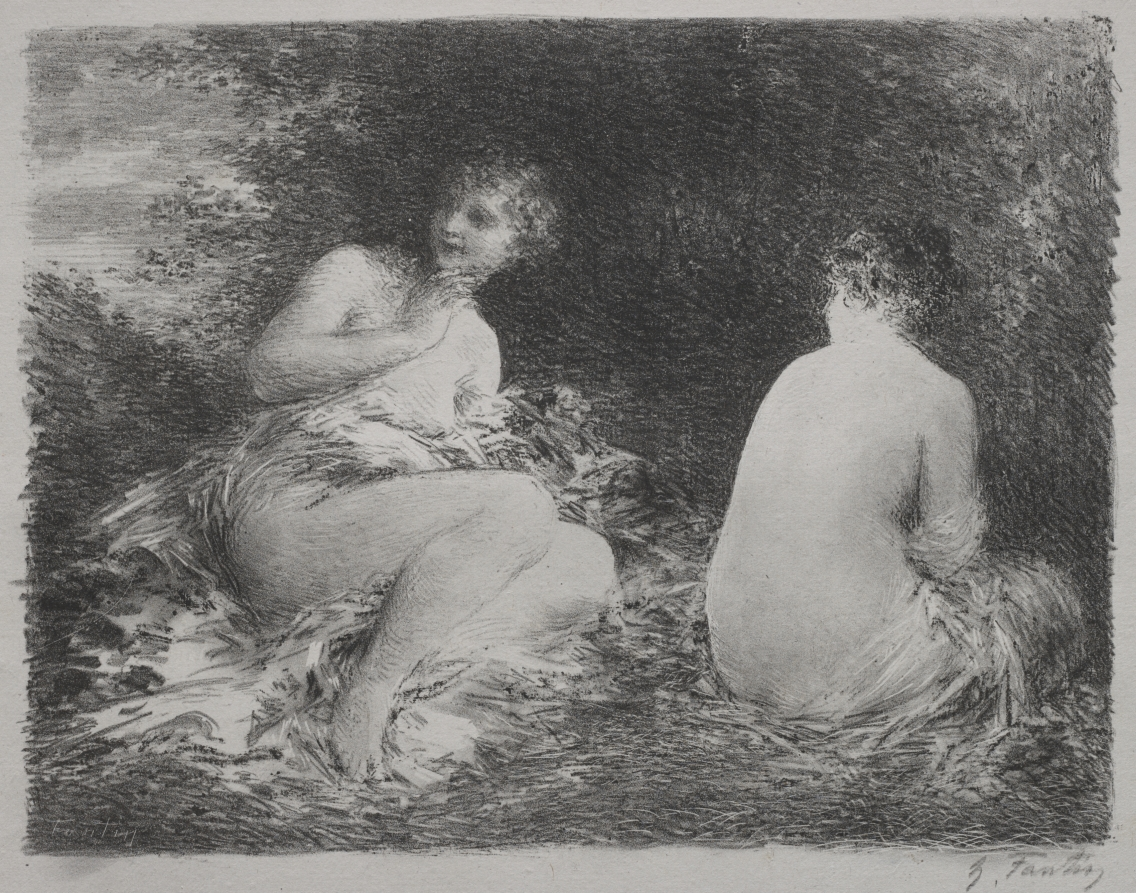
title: Bathers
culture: France, 19th century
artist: Henri Fantin-Latour (French, 1836–1904)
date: 1899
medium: lithograph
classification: Print